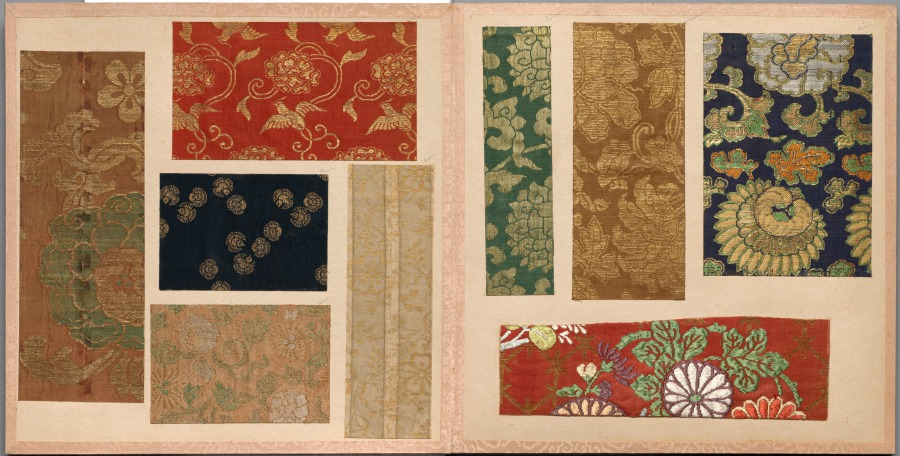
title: Album of Textile Samples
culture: Japan and China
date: 1700s–1800s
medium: silk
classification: Textile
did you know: This album has 26 pages containing 128 mounted Chinese or Japanese textile samples.